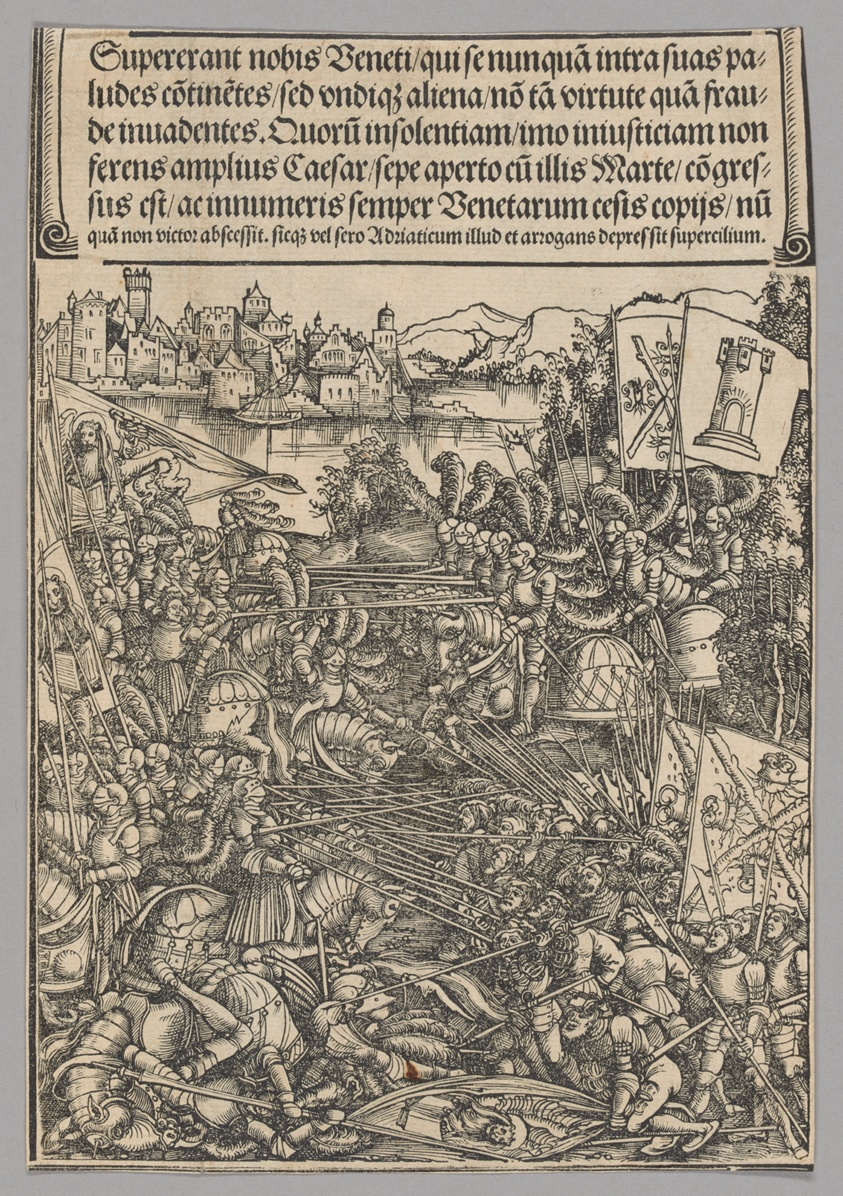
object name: Print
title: War with Venice, plate 21 from Historical Scenes from the Life of Emperor Maximilian I from the Triumphal Arch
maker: Hans Springinklee (German, c. 1495-after 1522); printed by Hieronymus Andreae (German, died 1556)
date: 1515-17, printed c. 1520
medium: Woodcut in black ink on cream laid paper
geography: Germany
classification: print; paper; woodcut; prints and drawing